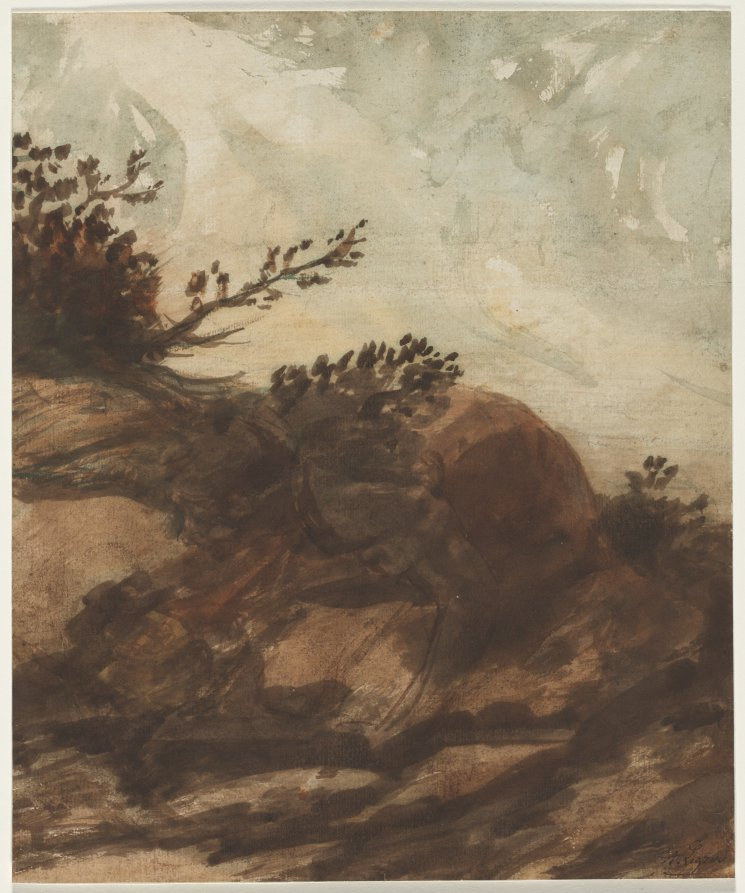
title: Sunset Over the Hill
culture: France, 19th century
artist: Alphonse Legros (French, 1837–1911)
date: last half 1800s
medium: watercolor and gouache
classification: Drawing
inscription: signed, lower right, in brown ink: A. Legros [underlined] ; SECONDARY SUPPORT (fragment, now removed), in blue ink: A Legros . / Coucher / Coucher [crossed out] de soleil sur la colline